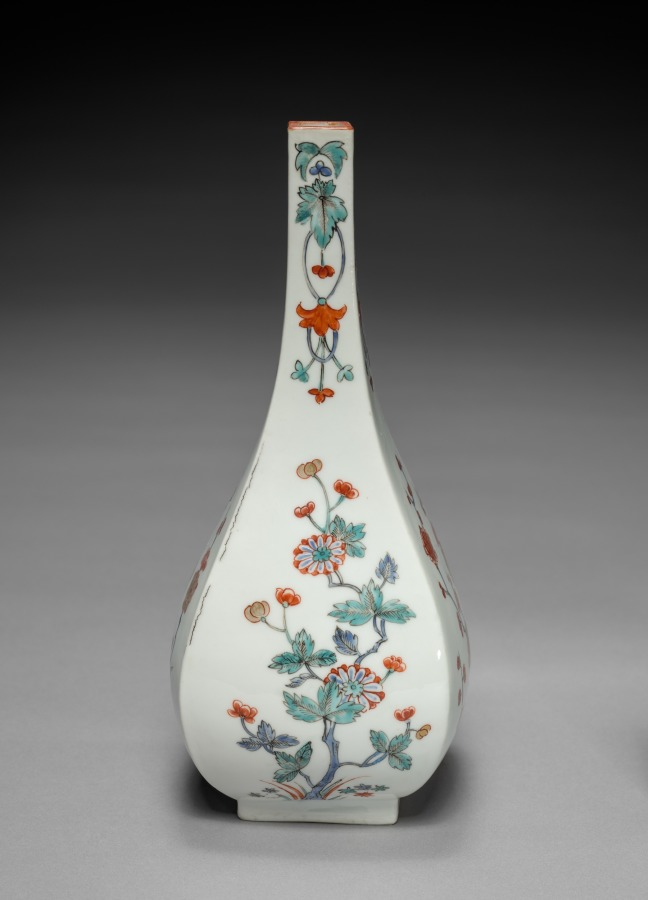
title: Bottle Vase with Plum and Chrysanthemum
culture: Japan, Edo period (1615–1868)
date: late 1600s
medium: porcelain with overglaze color enamel and gold (Hizen ware, Kakiemon type)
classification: Ceramic